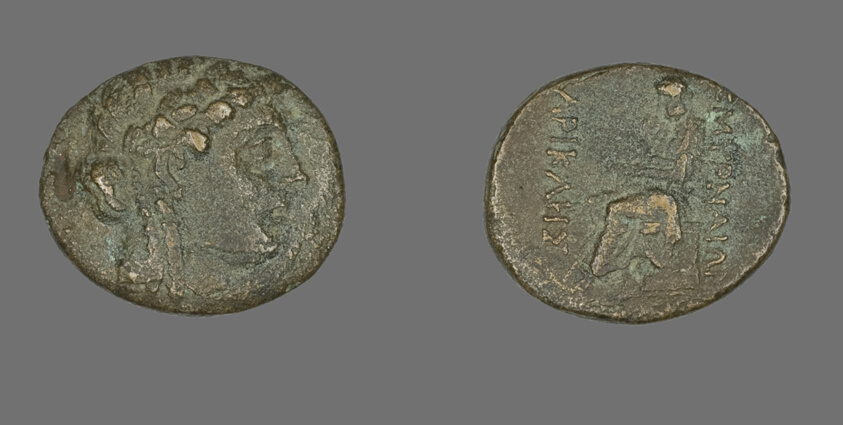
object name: Coin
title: Coin Depicting the God Apollo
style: greek, ancient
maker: Greek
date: 2nd-1st century BCE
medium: Bronze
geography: Ancient Greece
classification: coin; ancient art